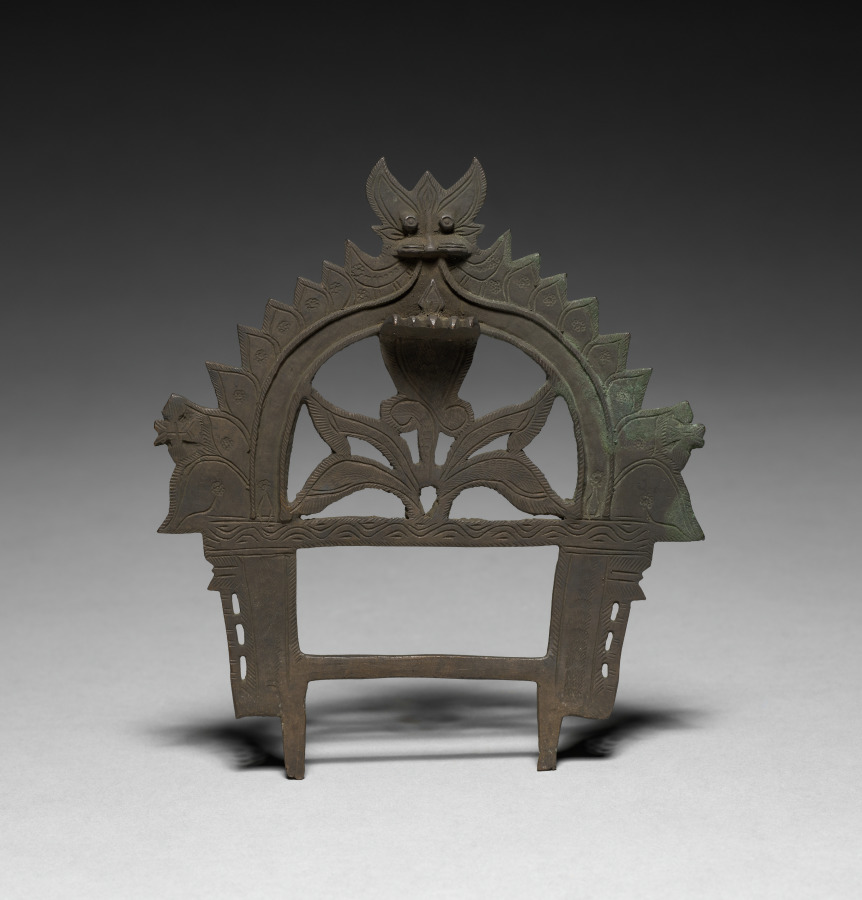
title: Aureole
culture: Burma, 19th century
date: 1800s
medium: brass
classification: Sculpture